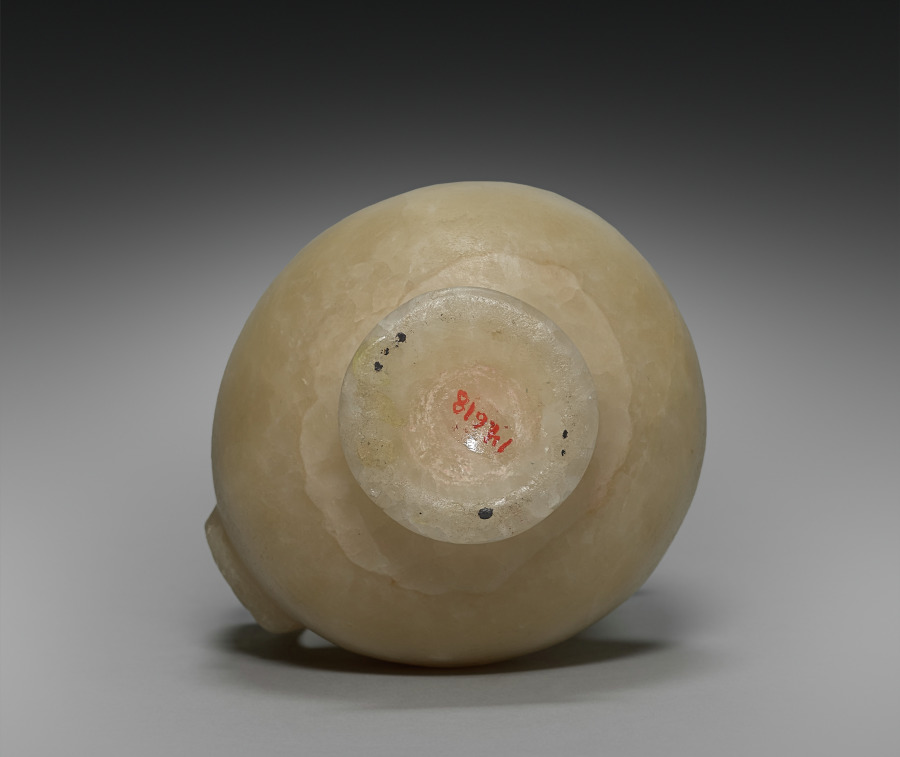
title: Long-Necked Flask with Strap Handle and Lid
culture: Egypt, New Kingdom (1540–1069 BCE), Dynasty 18, reign of Tuthmosis III (1479–1425 BCE)–reign of Amenhotep III (1390–1352 BCE)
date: 1401–1353 BCE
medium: travertine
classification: Vessels